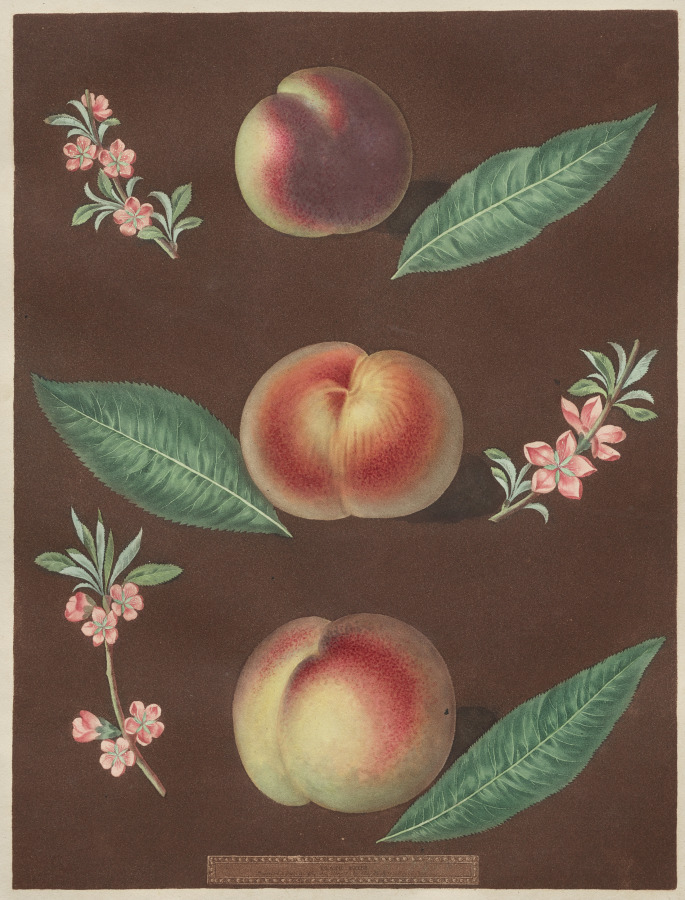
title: Pomona Britannica: No. 33 - Peaches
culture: England, 19th century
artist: George Brookshaw (British, 1751–1823)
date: 1805, published 1812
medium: aquatint and stipple engraving printed in color and hand colored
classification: Print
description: This color aquatint etching is one plate from George Brookshaw’s 1812 illustrated volume Pomona Britannica. Named after the Roman goddess of fruit trees, gardens, and orchards, Brookshaw intended the volume to be the English “country gentleman’s” guide to the science of classifying and identifying fruits (pomology). Many of Brookshaw’s models came from the Royal Gardens at Hampton Court and Kensington Gardens. Each print featured one fruit, often life-size, including detailed depictions of its flower and leaves. Printed in color with hand-painted highlights, this and other illustrated botanicals formed an essential part of the cultured English library in the early 19th century.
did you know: Peaches were not introduced to England until the 17th century, apparently from its North American colonies.